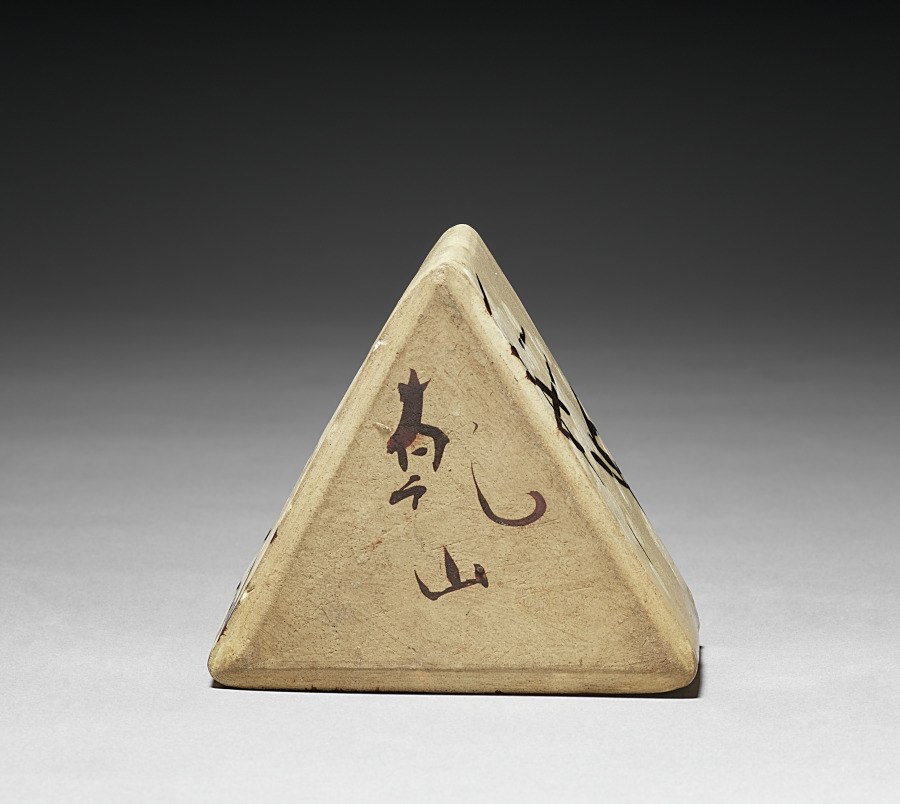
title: One of Five Serving Bowls (Mukozuke) with Prunus Design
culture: Japan, Edo period (1615–1868)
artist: school of Ogata Kenzan (Japanese, 1663–1743)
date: 1700s-1800s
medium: Kyoto Ware: stoneware with underglaze iron oxide and slip decoration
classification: Ceramic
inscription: signature on bottom, 3 characters in brown iron.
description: Note the rough, tan, clay bodies of these bowls with their deliberate irregularities. The design of branches was first painted in a black iron oxide, then the blossoms and buds in a white slip, followed by the application of a very thin transparent overglaze.